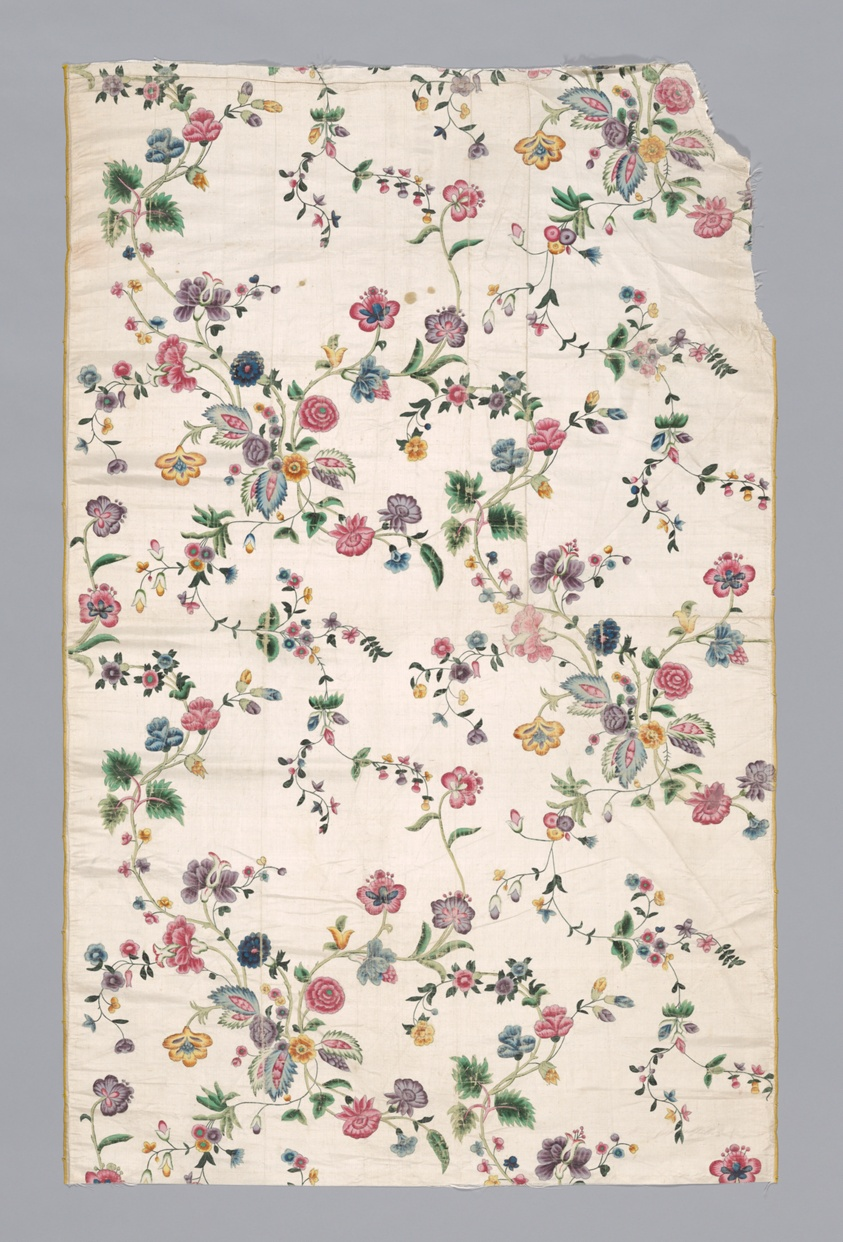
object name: Costume and Accessories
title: Length of Painted Silk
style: qing, 18th Century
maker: Chinese, for the European or American market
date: Qing dynasty (1644–1911), 1740-60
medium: Silk, plain weave foundation; painted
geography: China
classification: weaving; textile; silk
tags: flowers, vines, floral motifs, foliage, botanical/floral